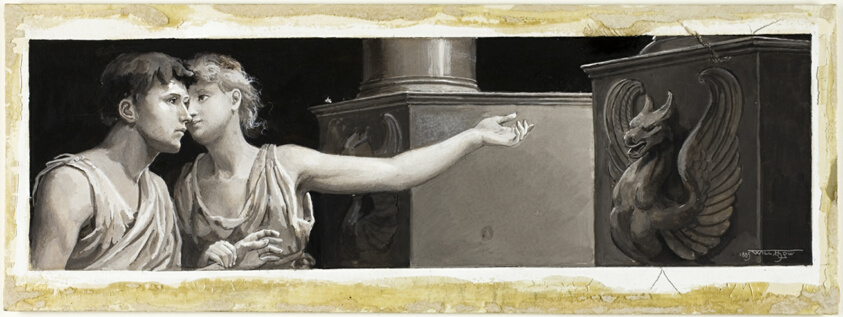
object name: Drawing and Watercolor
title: They had Arrived Before a Pillared Porch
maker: Will Hicock Low (American, 1853-1932)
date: 1885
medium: Black, gray and white gouache on cream wood-pulp laminate board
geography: United States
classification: drawings (visual works); prints and drawing